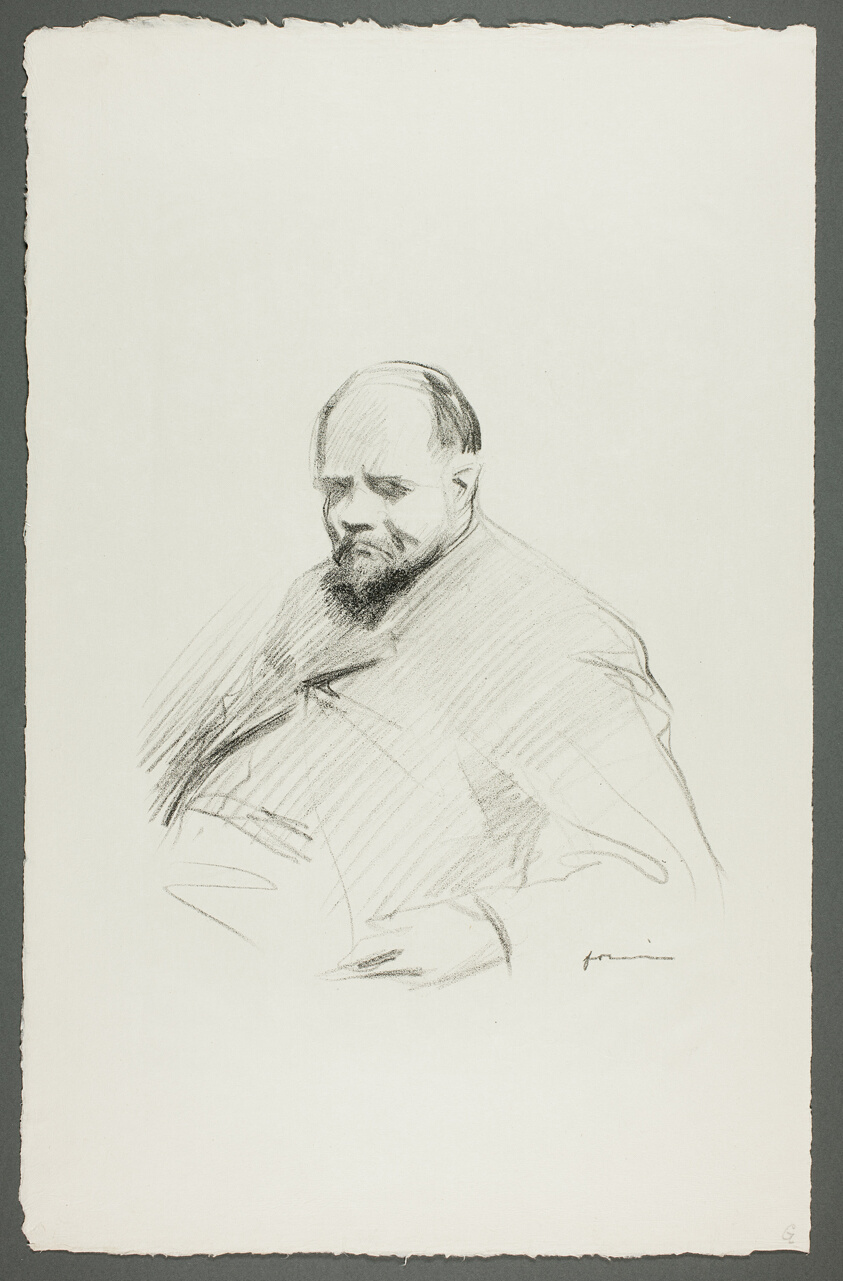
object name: Print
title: Portrait of Vollard, Seated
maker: Jean Louis Forain (French, 1852-1931)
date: c. 1910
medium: Lithograph on ivory wove paper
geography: France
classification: lithograph; print; prints and drawing